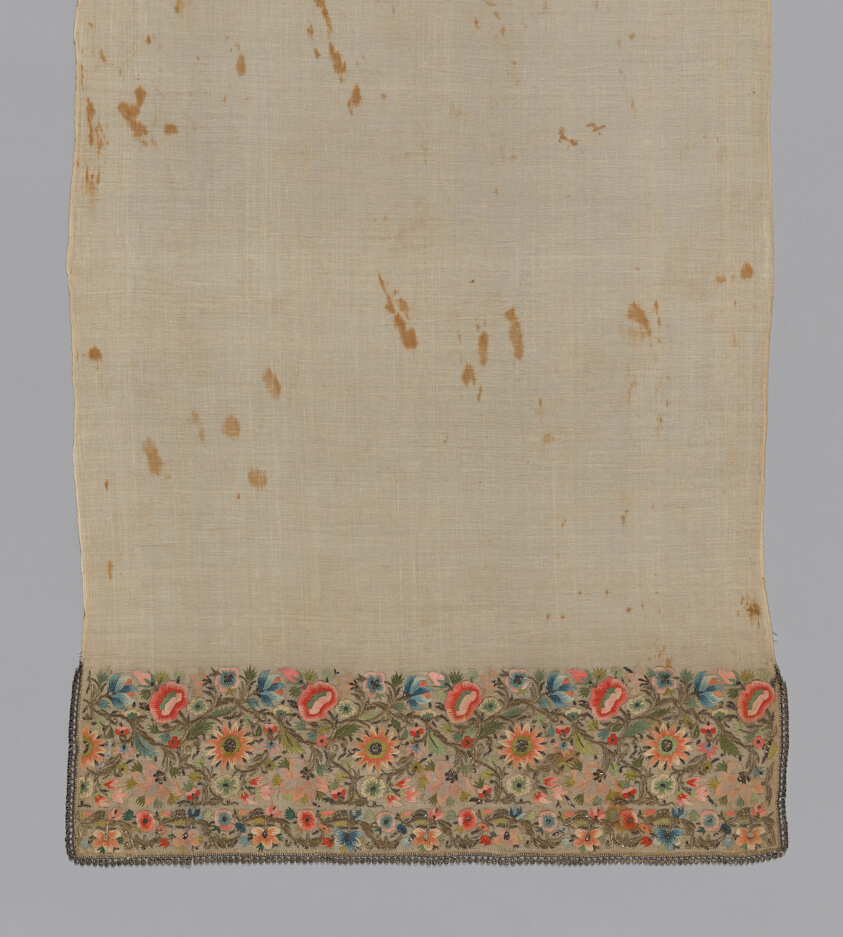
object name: Textile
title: Towel or Napkin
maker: Turkey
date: 19th century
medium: Embroidered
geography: Turkey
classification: textile; weaving; needlework (visual works)